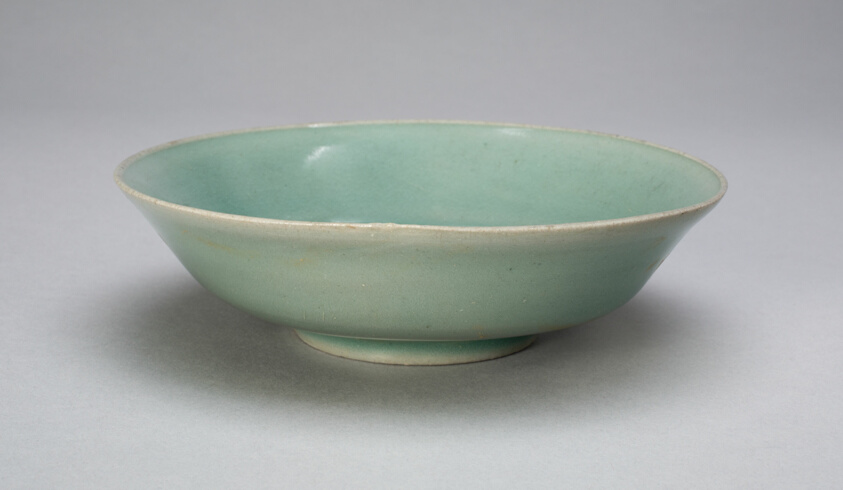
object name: Vessel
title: Dish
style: Korean (culture or style)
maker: Korea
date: Goryeo dynasty (918–1392), 12th century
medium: Celadon-glazed stoneware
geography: Korea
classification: dish (vessel); stoneware; asian art; ceramics; vessel